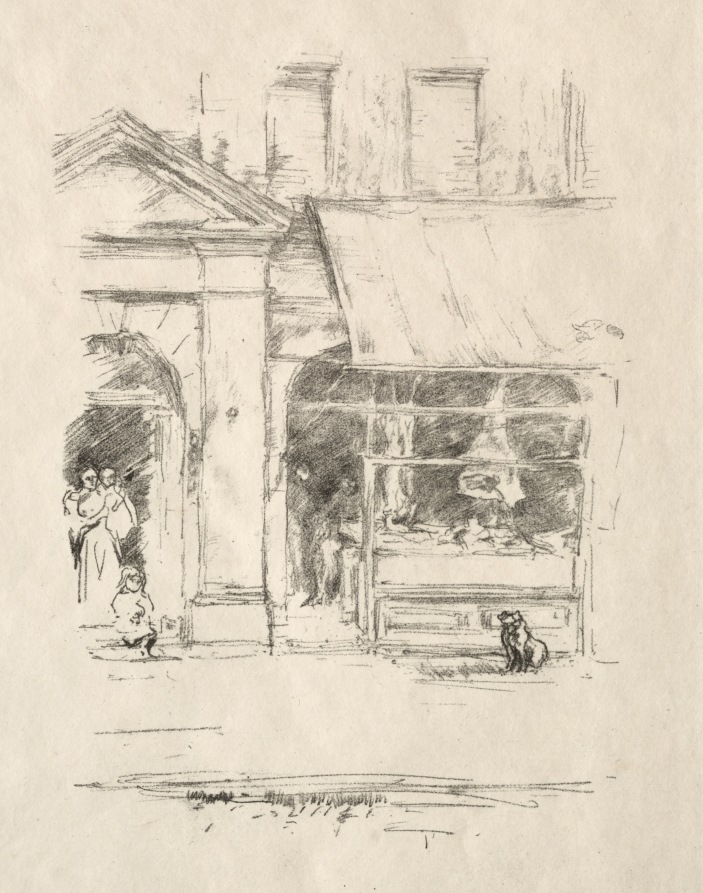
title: The Butcher's Dog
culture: America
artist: James McNeill Whistler (American, 1834–1903)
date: 1896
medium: lithograph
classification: Print